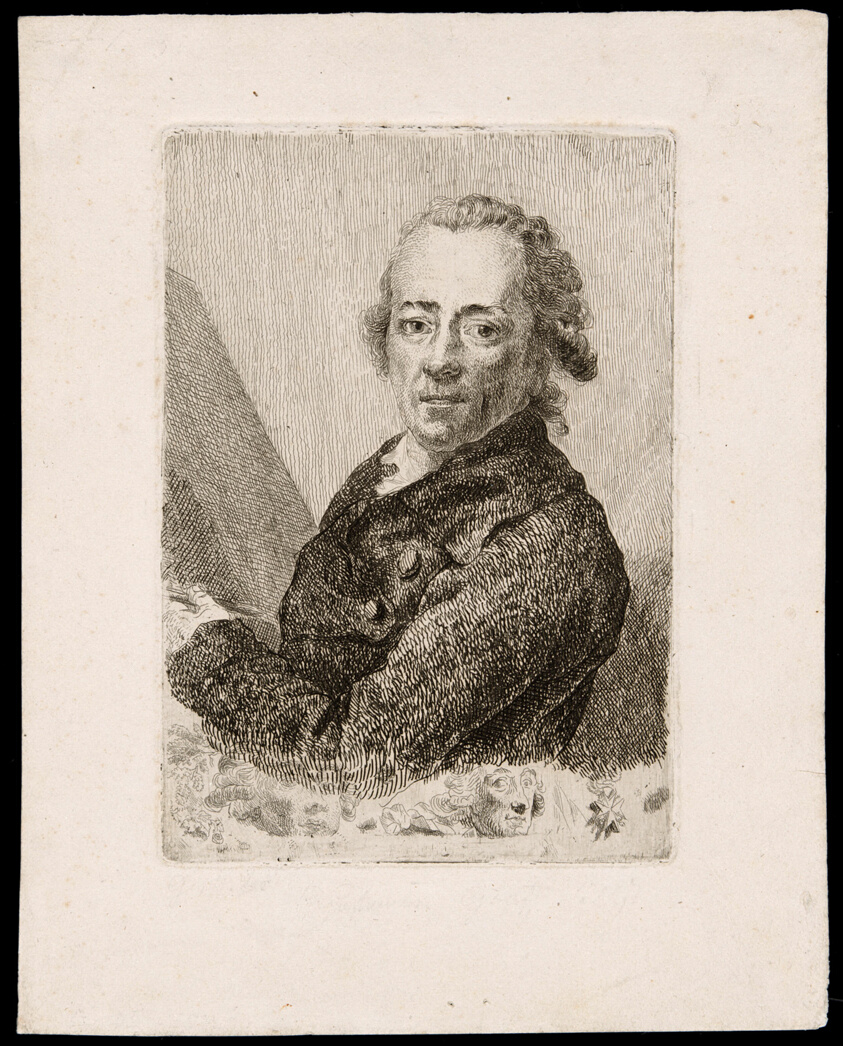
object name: Print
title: Self-Portrait before an Easel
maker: Anton Graff (German, born Switzerland, 1736-1813)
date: c. 1787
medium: Etching in black on cream laid paper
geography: Germany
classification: etching; print; prints and drawing